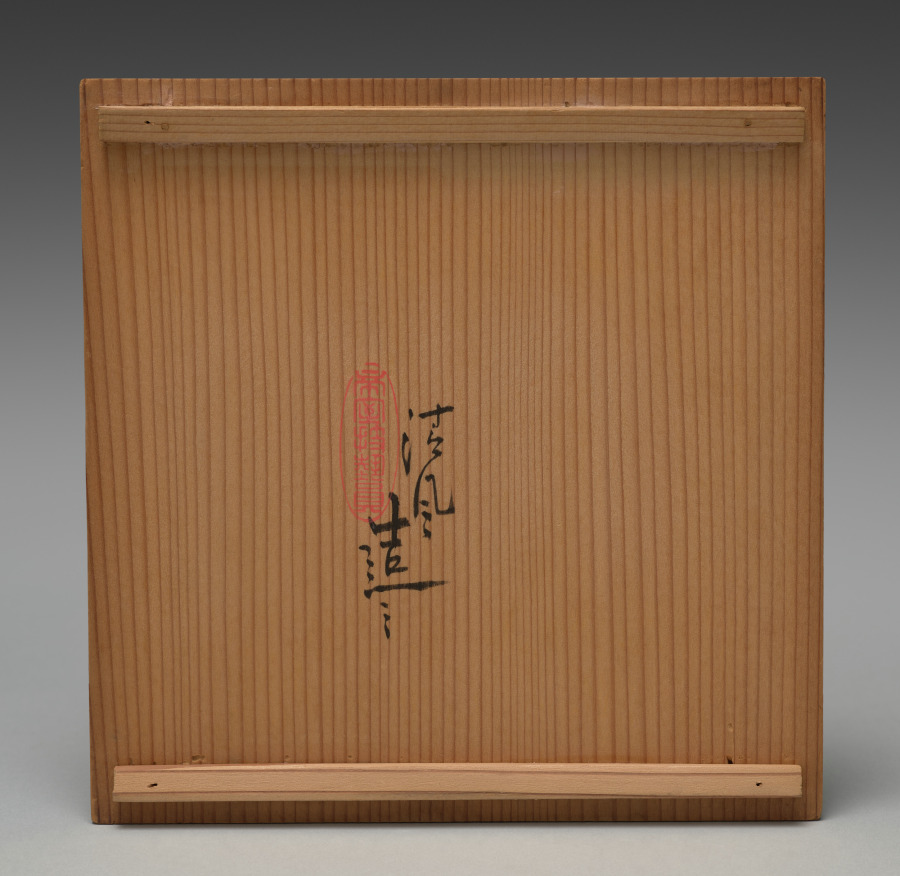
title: Pine-shaped Dish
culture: Japan, Meiji period (1868–1912)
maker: Seifū Yohei III (Japanese, 1851–1914)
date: 1893–1914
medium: Stoneware with underglaze iron oxide and crackled glaze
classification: Ceramic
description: The clever design on this stoneware Awata-style dish makes use of the interior and exterior surfaces to present a close-up view of pine needles on the branch painted in underglaze iron oxide. The branch is shown on the outside of one side of the dish, while the needles fan out across the inside. The entire dish, when seen from above, reveals a shape resembling the mushroom cap–like motif appearing in textile designs and in classical Japanese paintings called Yamato-e to represent pine trees.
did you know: Awata ware, named for the area of Kyoto where it was historically produced, is considered a subset of Kyoto ware. It is characterized by a very light brown body with a transparent crackled glaze.